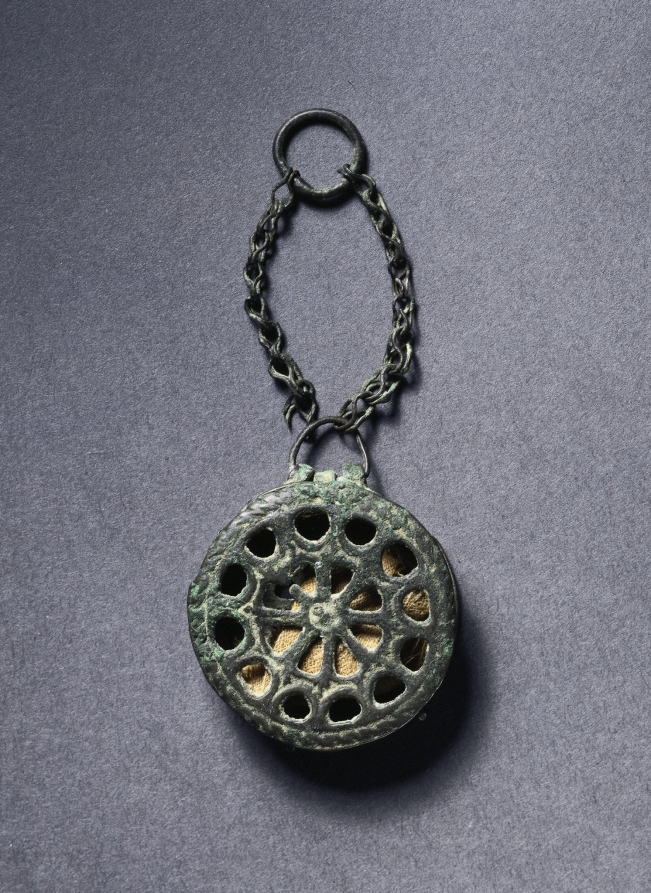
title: Phylactery (Reliquary Penant)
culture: Byzantium, Egypt or Syria, early Byzantine period, 6th-8th centuries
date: c. 500–700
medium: copper alloy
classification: Metalwork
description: Made in the 500s, this Byzantine phylactery, or personal reliquary, was meant to be worn around the neck on a chain. It is fashioned of bronze and still contains its original linen-wrapped relic.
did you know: This was gifted to the museum in memory of Robert P. Bergman, former director of the museum and medievalist.